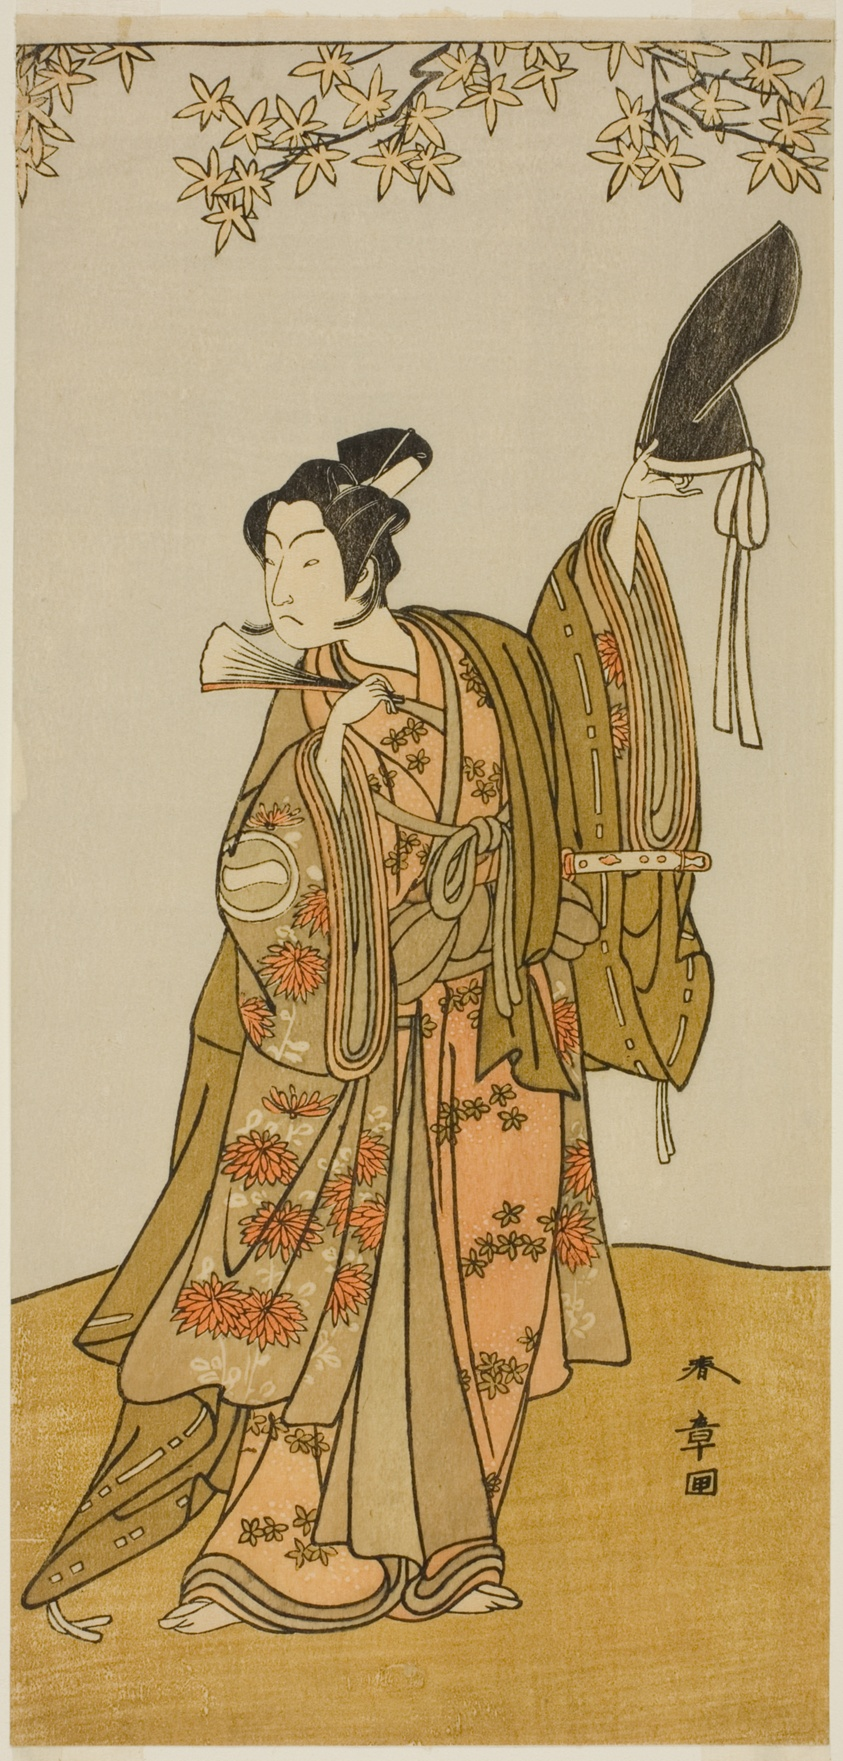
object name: Print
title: Ichikawa Monnosuke II as Shimokōbe Shōji Yukihira and Segawa Yūjiro I as Matsukaze, Sister of Togashi no Saemon, in “Your Favorite Play: The Subscription List” (Gohiiki Kanjinchō)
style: Japanese (culture or style)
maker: Katsukawa Shunsho 勝川 春章 (Japanese, 1726-1792)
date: c. 1773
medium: Color woodblock print; hosoban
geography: Japan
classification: woodblock print; print; asian art